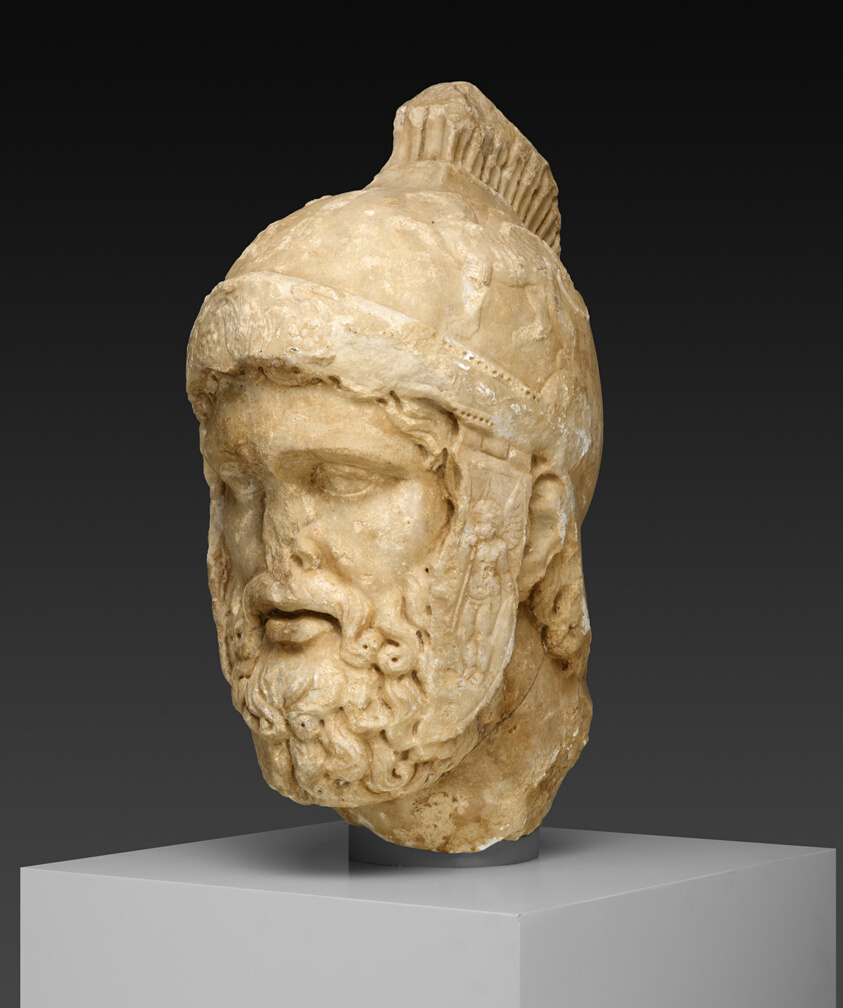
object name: Sculpture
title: Head of Mars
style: imperial (roman), ancient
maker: Roman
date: 2nd century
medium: Marble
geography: Roman Empire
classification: marble; stone; sculpture; ancient art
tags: mythology, goddesses, gods (deities), military